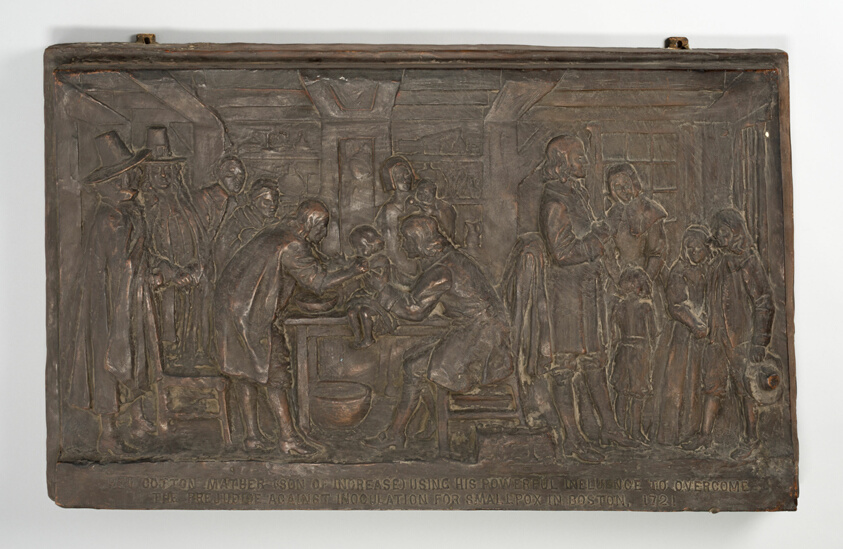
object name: Sculpture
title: Rev. Cotton Mather (Son of Increase) Using His Powerful Influence to Overcome the Prejudice Against Inoculation for Smallpox in Boston, 1721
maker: Sally James Farnham (American, 1869–1943)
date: c. 1915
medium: Bronze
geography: United States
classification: sculpture; american arts